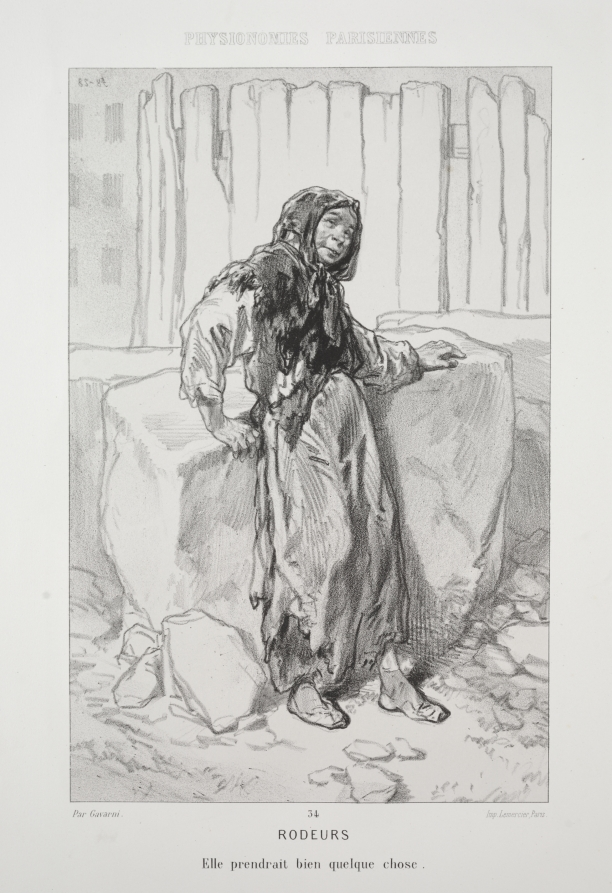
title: Rodeurs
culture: France, 19th century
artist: Paul Gavarni (French, 1804–1866)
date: c. 1857–58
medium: lithograph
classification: Print